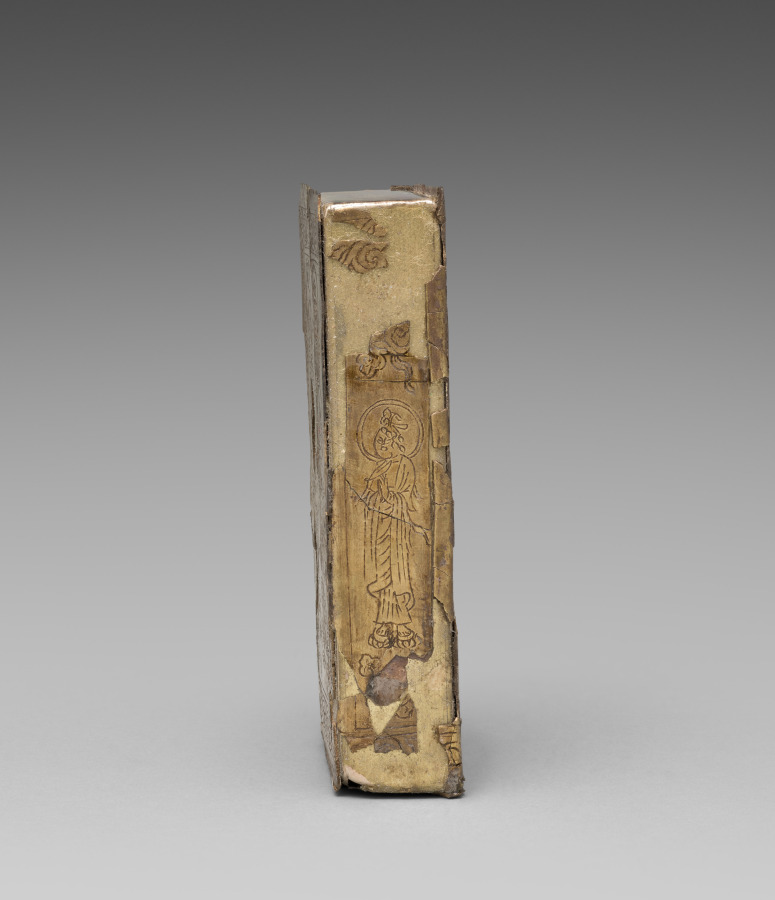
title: Buddhist Sutra Container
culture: Korea, Goryeo dynasty (918–1392)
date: 1100s-1200s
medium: gilt silver with incised Buddhist designs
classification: Metalwork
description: This container was designed to hold sutras, or Buddhist sacred texts. The Four Heavenly Kings, one for each of the cardinal directions, are incised on the exterior of the container. Images of the Four Heavenly Kings can often be found on Korean containers for sacred relics and sutras, and are symbolic of the wish to preserve the Buddha’s teachings.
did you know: This container was designed to hold a portable Buddhist sacred text.